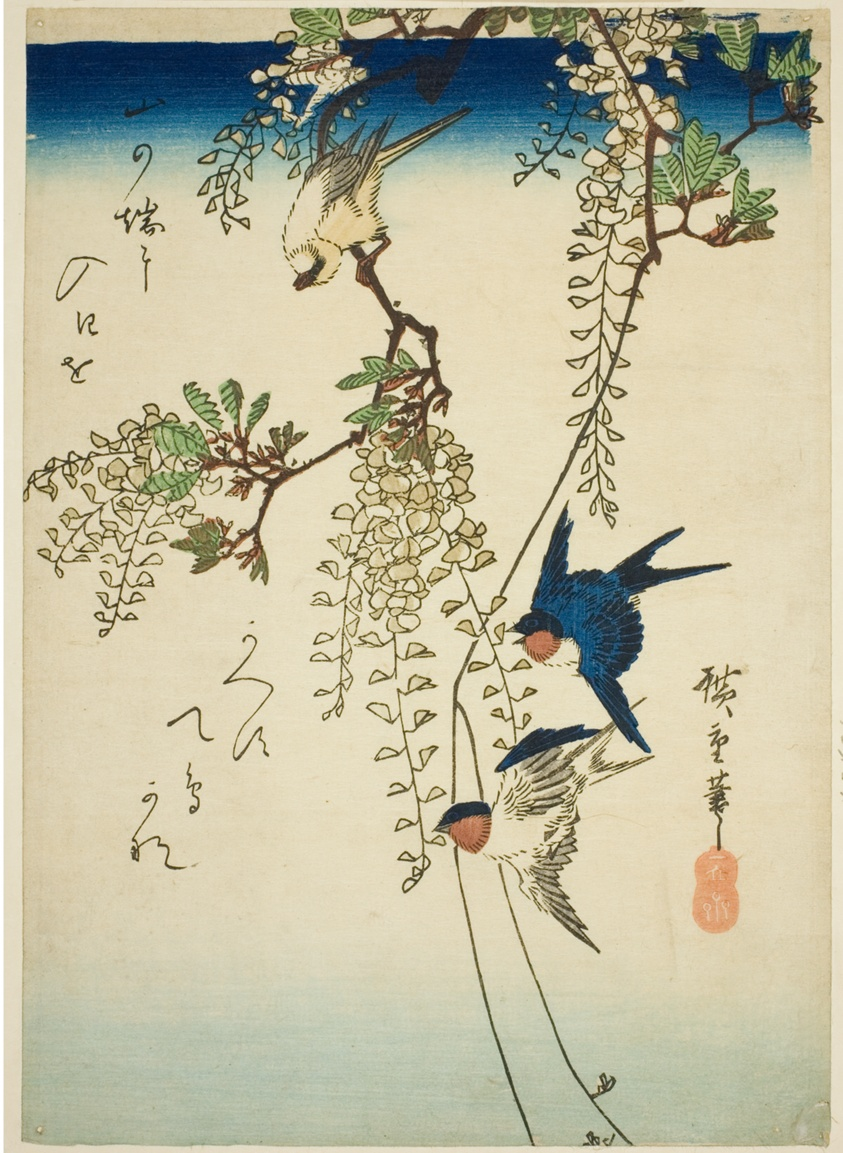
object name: Print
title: Swallow, yellow bird, and wisteria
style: Japanese (culture or style)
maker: Utagawa Hiroshige 歌川 広重; Japanese, 1797-1858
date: 1830s–1840s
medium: Color woodblock print; chuban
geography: Japan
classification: woodblock print; print; asian art